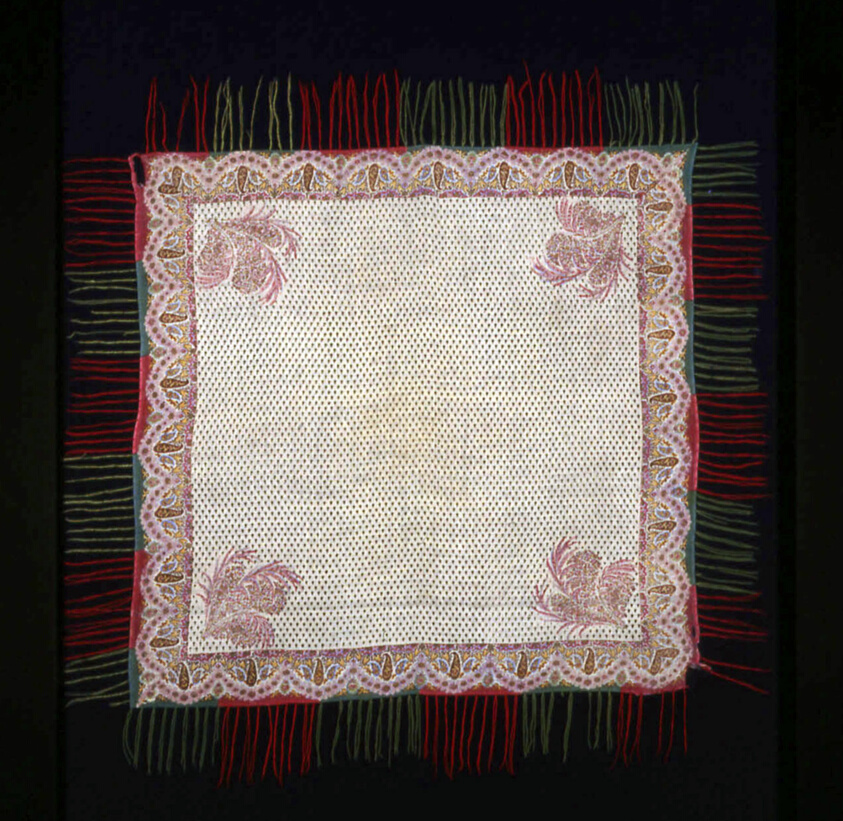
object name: Costume and Accessories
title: Shawl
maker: England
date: 1825/50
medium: Cotton and wool, twill weave; block printed; attached knotted fringe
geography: England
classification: textile; weaving; costume; weaving - printed